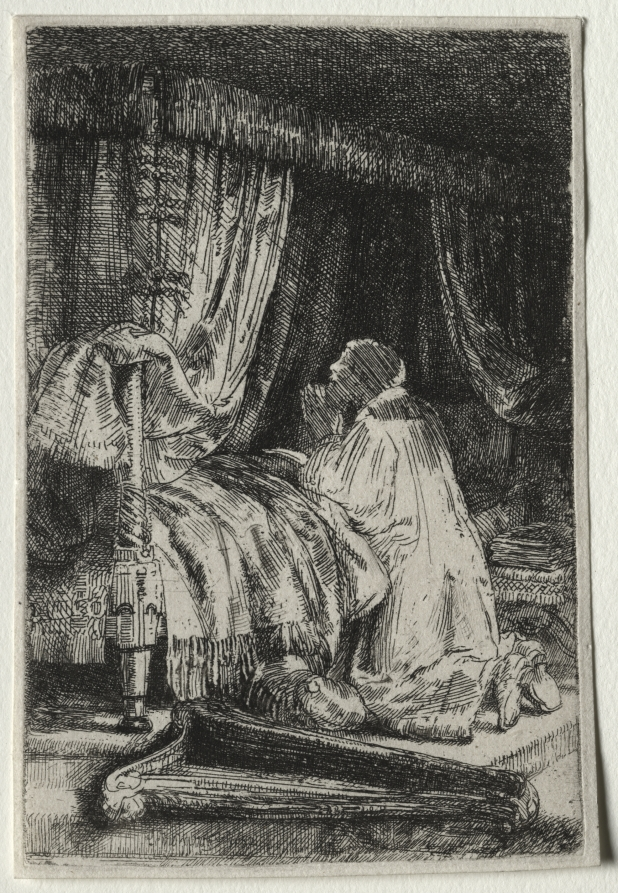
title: David in Prayer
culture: Netherlands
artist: Rembrandt van Rijn (Dutch, 1606–1669)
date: 1652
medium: etching with drypoint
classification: Print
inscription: lower left, in plate: Rembrandt f. 1652